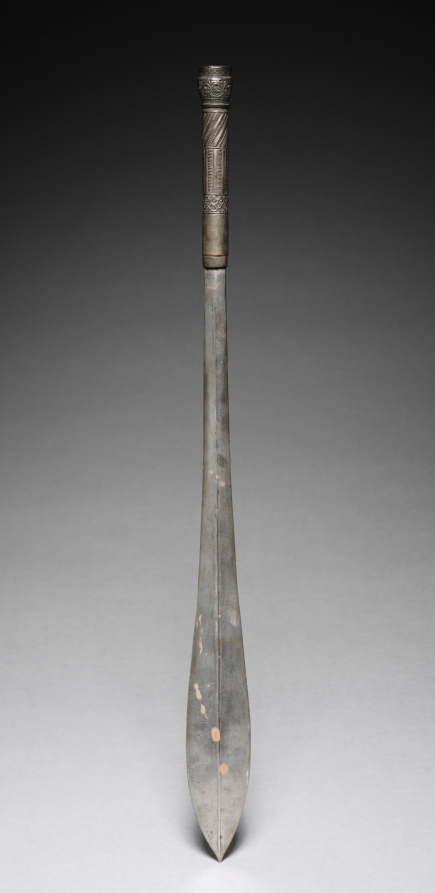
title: Dagger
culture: Africa, East Africa, Kenya or Uganda, unknown maker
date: by 1916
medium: Silver and metal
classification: Arms and Armor